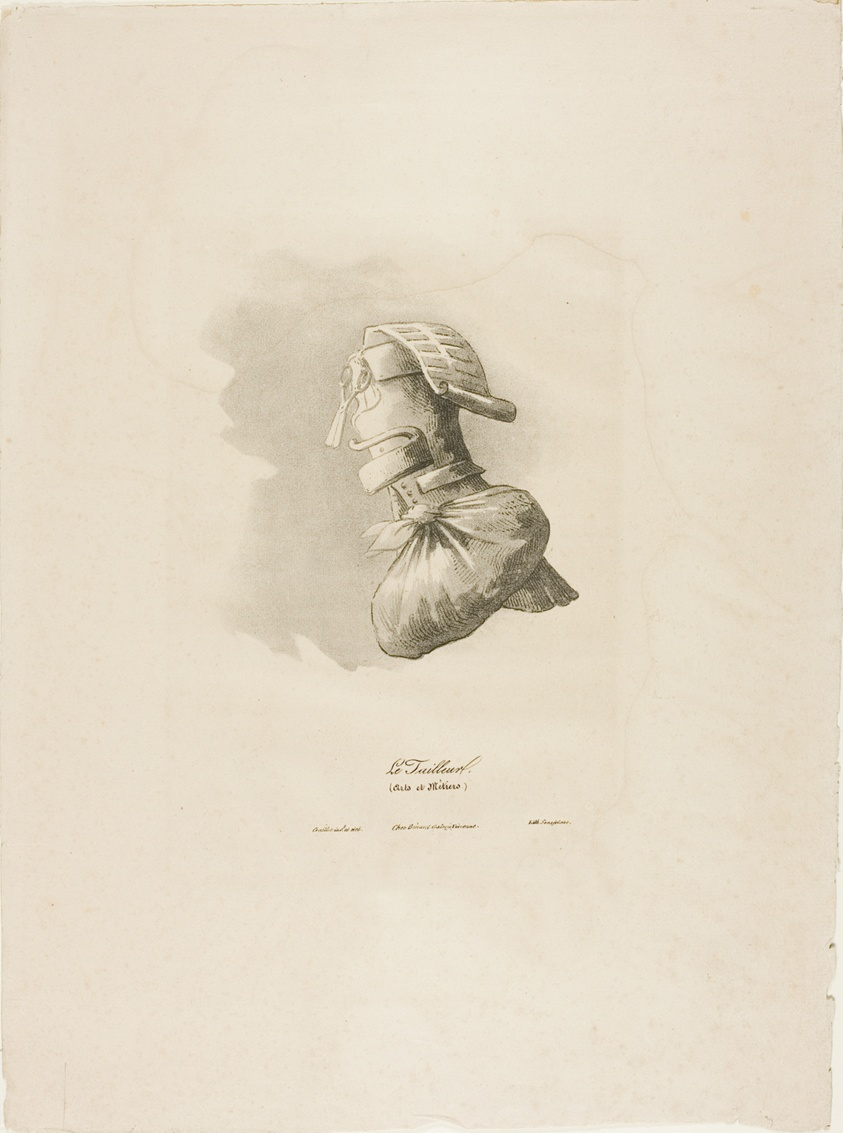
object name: Print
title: The Tailor, from Arts et Métiers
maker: Bernard Gaillot (French, 1780-1847); printed by Alois Senefelder (German, 1771-1834)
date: 1838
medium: Lithograph in black on buff wove paper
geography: France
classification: lithograph; print; prints and drawing